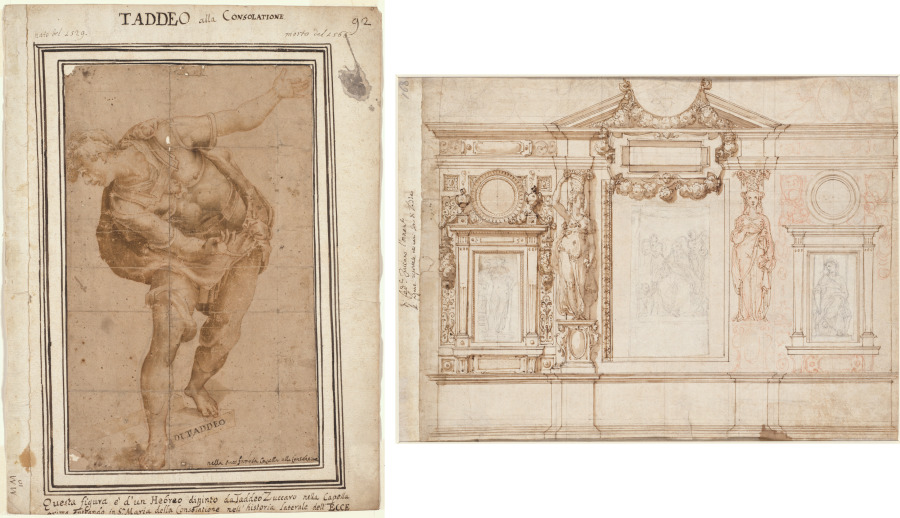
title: Un Hebreo, from Christ Shown to the People (recto); Design for a Wall Decoration with Pasted-in Sketches after Raphael (verso)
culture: Italy, 16th century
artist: Frederico Zuccaro (Italian, 1540/1–1609)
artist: after Taddeo Zuccaro (Italian, 1529–1566)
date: after 1556 (recto), c. 1580s-90s (verso)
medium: Brown wash with outlining in pen and brown ink and red chalk, with traces of black chalk (recto); Pen and brown ink with brown wash over red chalk and traces of pencil, the three pasted-in compositional sketches in black chalk laid down on an album sheet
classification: Drawing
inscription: RECTO: annotated by Resta in pen and brown ink in the lower right corner of the drawing: nella sua famosa Capella alla Consolatione; on the front of the step beneath the figure's left foot: DI TADDEO; the album sheet is further annotated in pen and brown ink at the top margin: TADDEO alla CONSOLATIONE / nato del 1529. Morto del 1566; lower margin: Questa figura è d'un Hebreo dipinto da Taddeo Zuccaro nella Capella prima entrando in Sa. Maria della Consolatione nell'historia laterale dell'ECCE; paginated in pen and brown ink at top right corner: 92; an inventory number (?) in the lower left corner: MM/10 VERSO: annotated by Resta on the album sheet in pen and brown ink, left margin: di Fed. Zuccaro l'ornamt[i] / le figure riportate nei vani sono di Taddeo